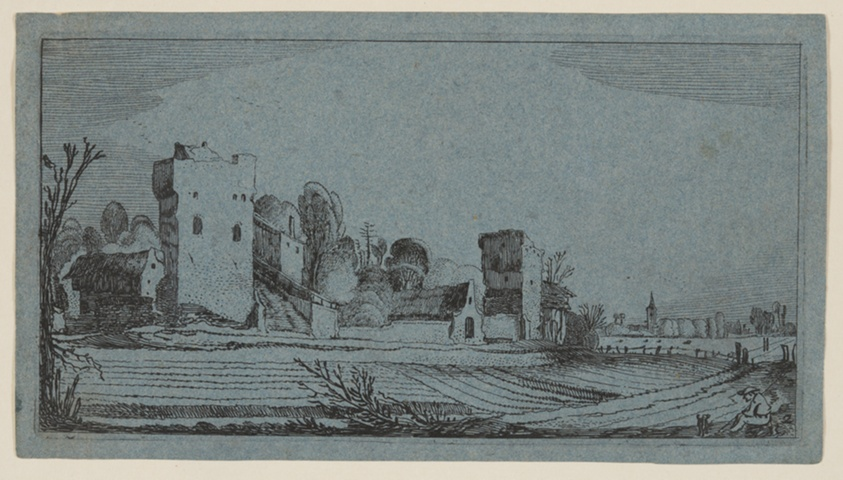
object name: Print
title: Fields Before Ruins Transformed into Farms, from Twelve landscapes with Figures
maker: After Gillis van Scheyndel; Dutch, 1595–1660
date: 1624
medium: Etching in black on blue laid paper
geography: Netherlands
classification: etching; paper; print; prints and drawing